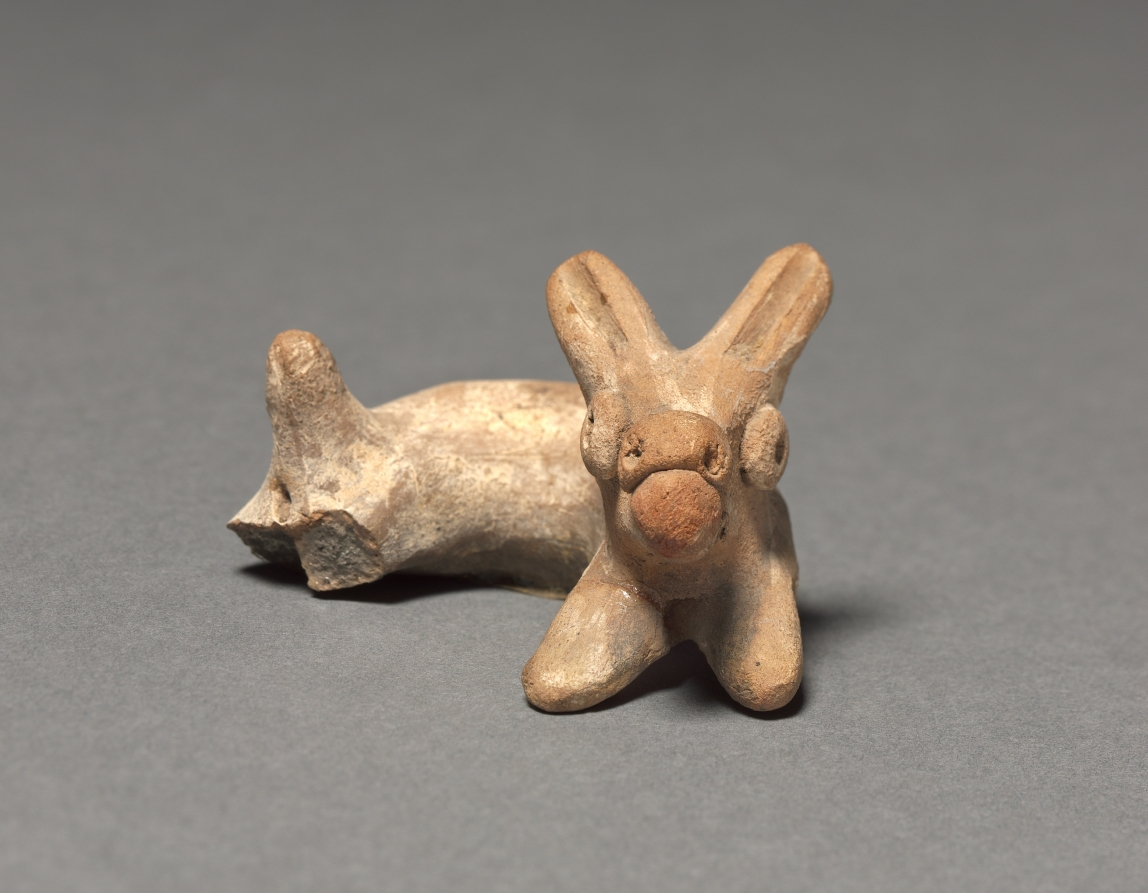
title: Animal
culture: Mexico, Western, Colima (?)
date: 200 BCE–300 CE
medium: terracotta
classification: Ceramic